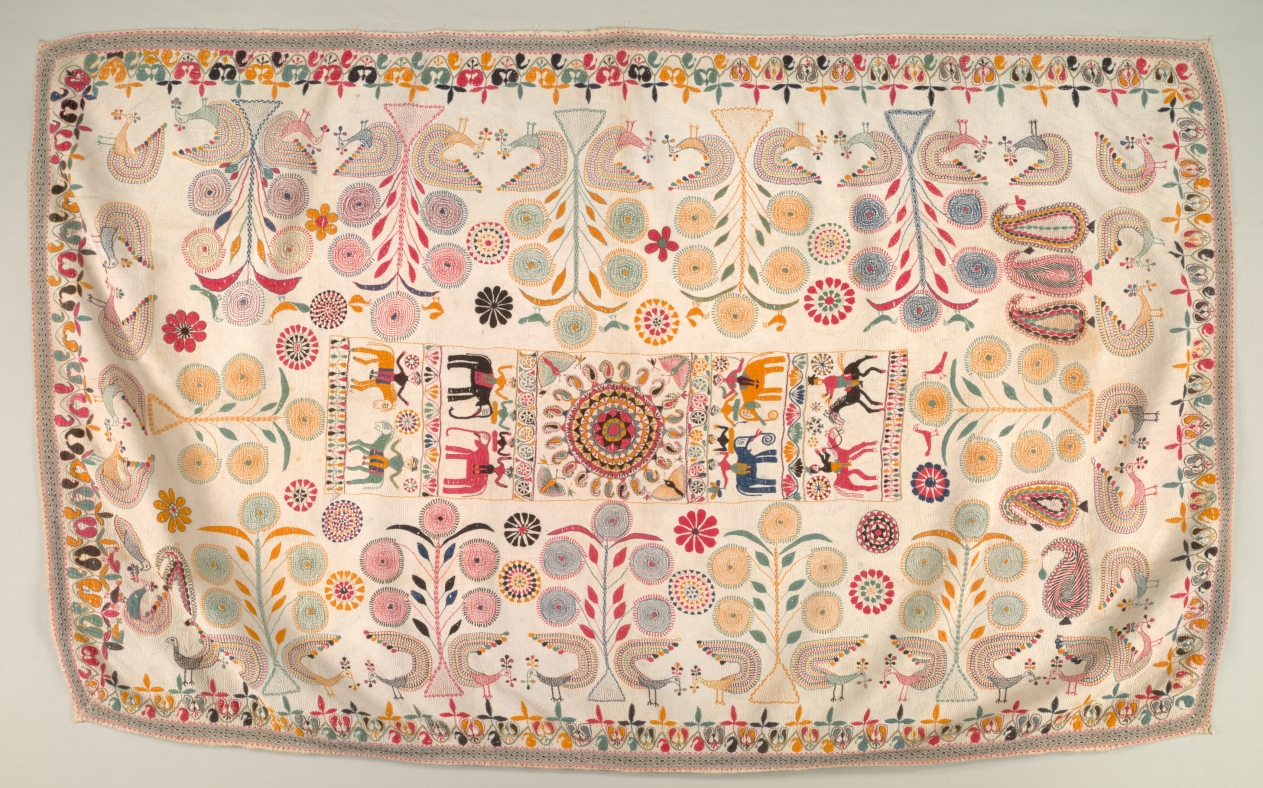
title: Kantha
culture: India, Bengal, 19th century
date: 1800s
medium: embroidery and quilting, cotton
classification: Embroidery